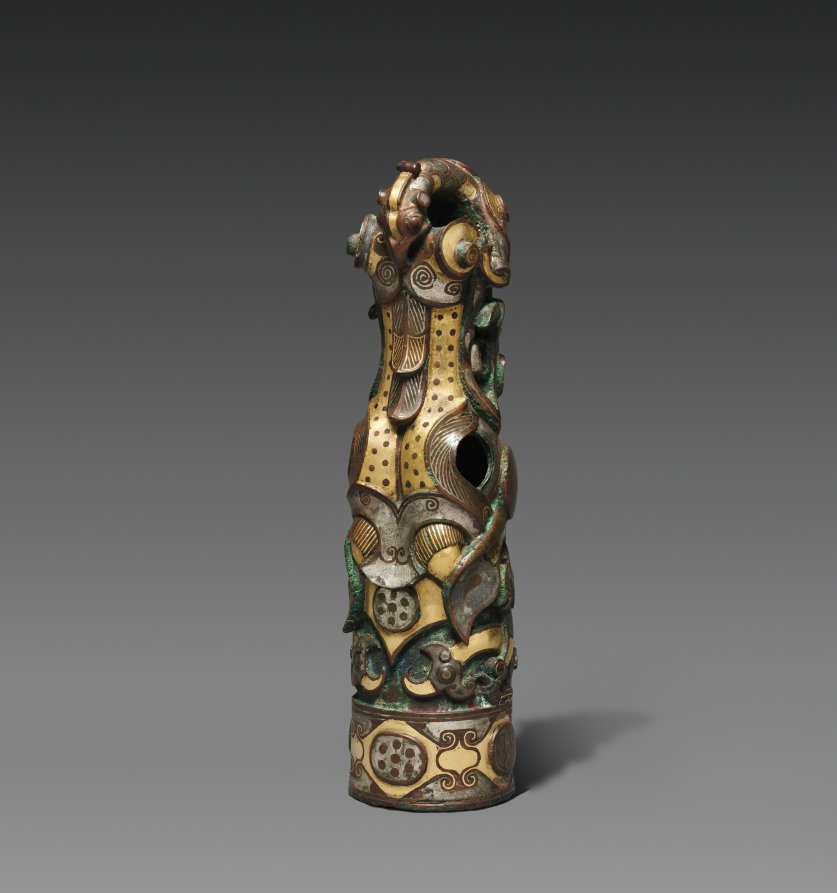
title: Finial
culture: China, Henan province, Jincun, Warring States period (475–221 BCE)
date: 475–221 BCE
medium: bronze inlaid with gold and silver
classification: Metalwork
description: Chariots and weapons were associated with hunting and warfare in the ancient world. Those bronze fittings with lavish inlaid decoration were status symbols of rulers and high-ranking officials. This finial combines extravagance and ferocious beauty to reveal the aesthetics of the time. The birds with hooked beaks are above the intertwined serpent-dragons. Such artistic conception emphasizes the power of the bird in combat. Every facet of this finial is exquisitely crafted to give full play to the inlaid decoration.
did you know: This finial is made to be placed on the top of a pole or staff.